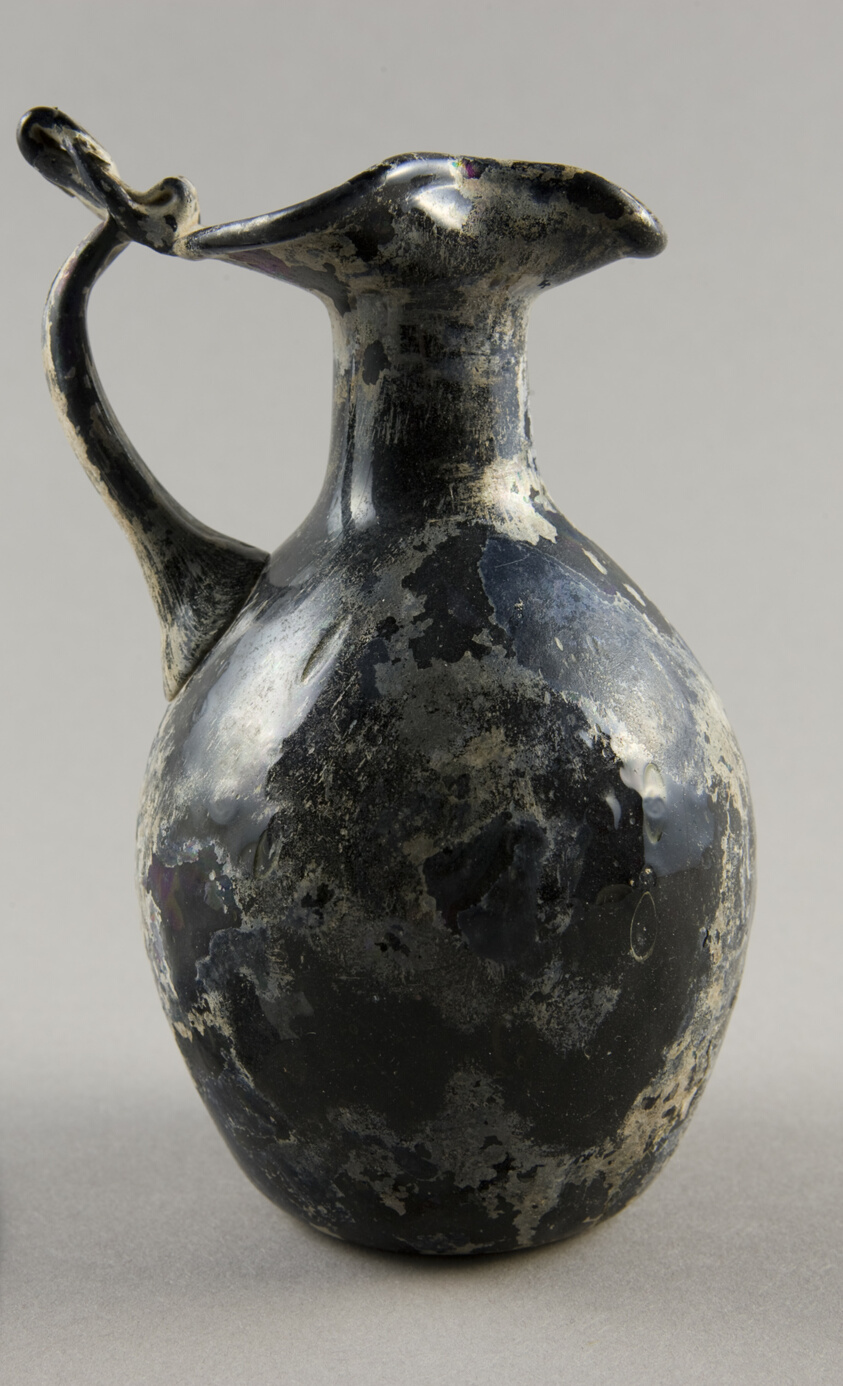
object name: Vessel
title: Pitcher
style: syrian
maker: Roman; Levant or Syria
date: 4th century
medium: Glass, blown technique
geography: Syria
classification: glass; vessel; ancient art